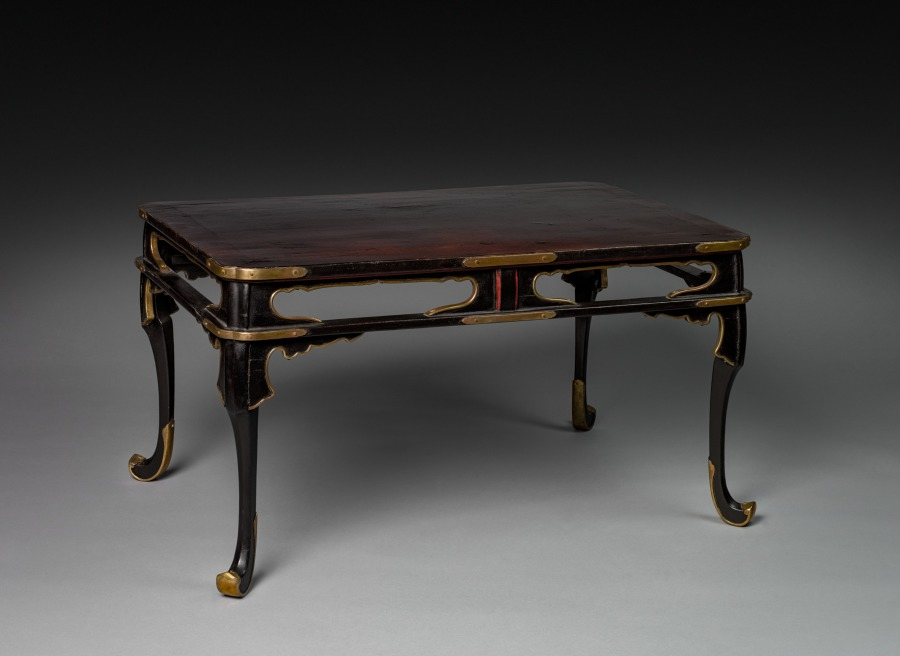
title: Table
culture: Japan, Muromachi period (1392–1573)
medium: wood with lacquer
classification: Lacquer